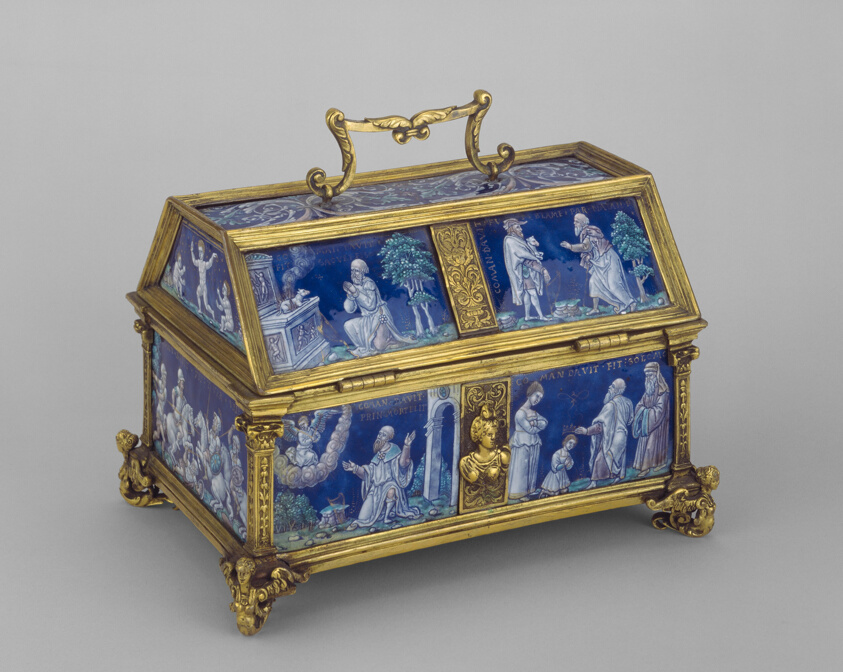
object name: Decorative Arts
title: Casket with Scenes of David and Solomon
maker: Attributed to the workshop of Pierre Reymond; French, 1513-after 1584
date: c. 1550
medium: Painted enamel on copper and gilded bronze mounts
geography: Limoges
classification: enamel; european decorative arts; decorative arts